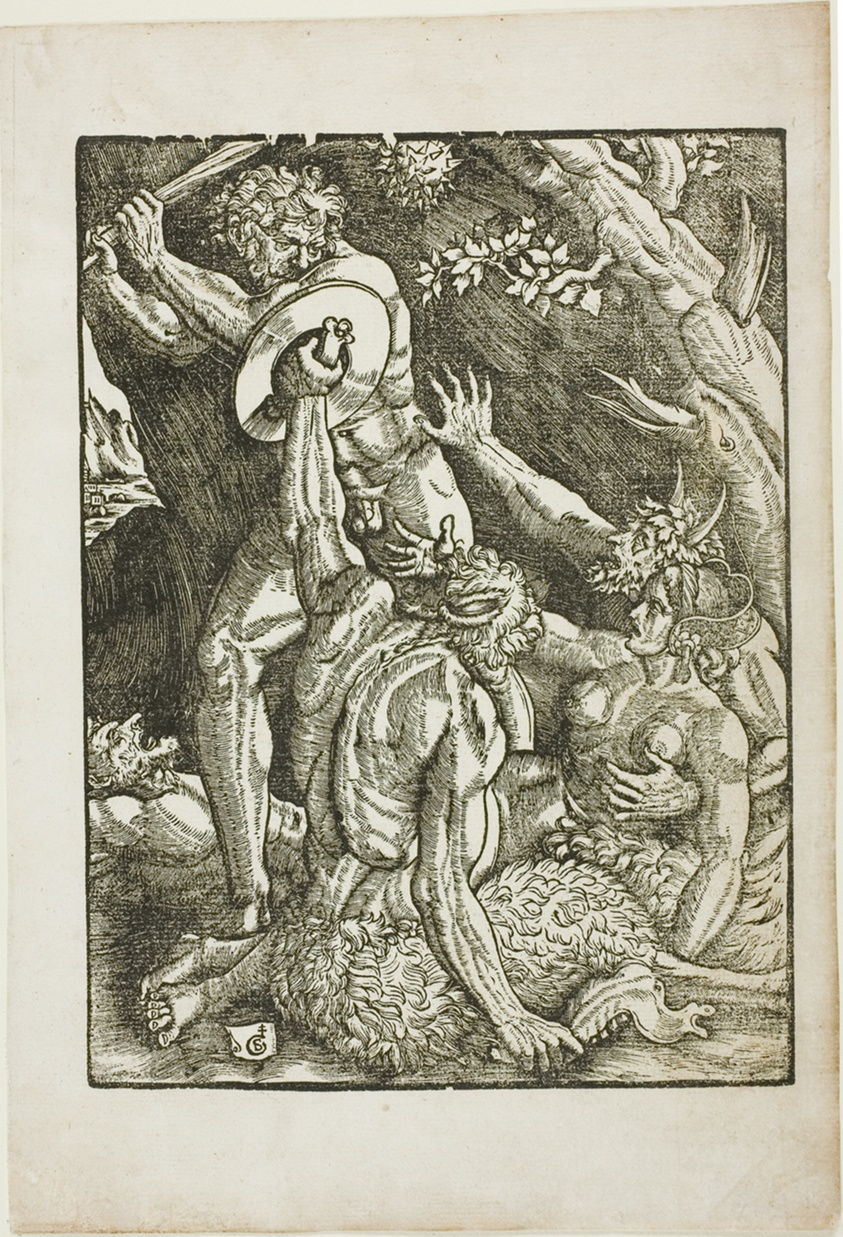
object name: Print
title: Hercules, Two Satyrs, and a Woman, plate two from The Labors of Hercules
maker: Gabriel Salmon (French, active 1504-1542)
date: c. 1528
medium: Woodcut on ivory laid paper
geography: France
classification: woodcut; print; prints and drawing